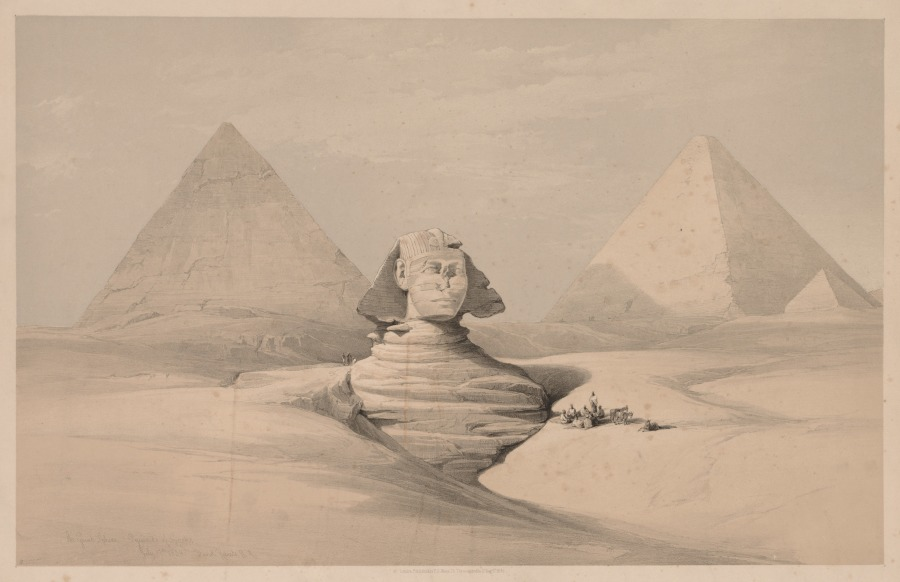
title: Egypt and Nubia: Volume I - No. 18, The Great Sphinx, Pyramids of Gizeh, Front View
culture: England, 19th century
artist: Louis Haghe (British, 1806–1885)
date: 1839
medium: color lithograph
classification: Print